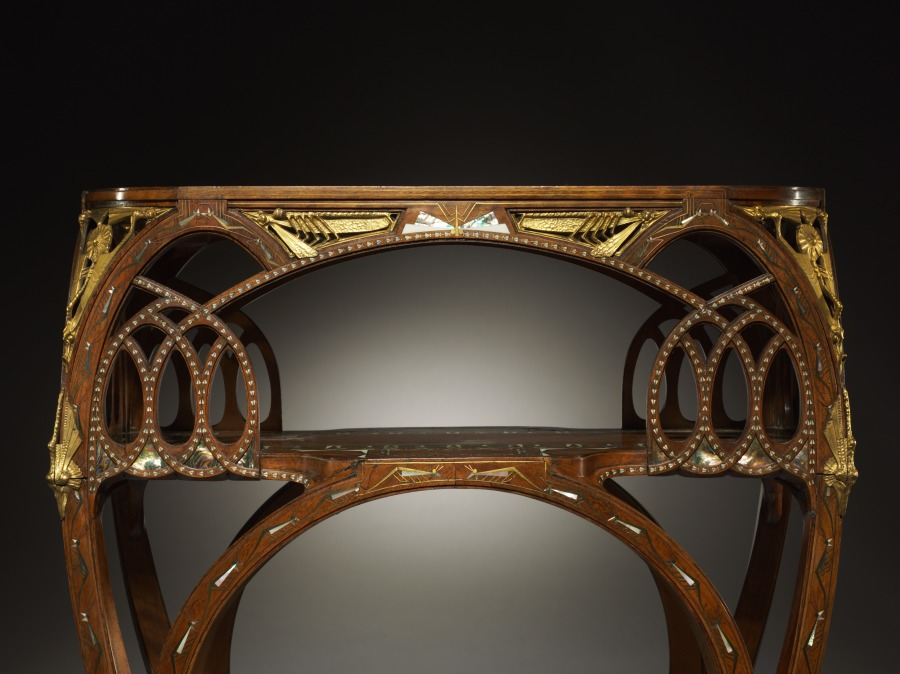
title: Tea Table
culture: France, Paris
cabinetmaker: Carlo Bugatti (Italian, 1856–1940)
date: c. 1907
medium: inlaid wood (mahogany?), cast and gilded bronze mounts, inlays of ivory or bone, metal, and mother-of-pearl (marine mussels or pearl oysters)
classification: Furniture and woodwork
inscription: signed in ligature in white metal inlay on central shelf: Bugatti.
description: Luxurious materials might catch the eye first, but a closer look reveals the imaginary creatures that adorn the surface of this table. Featuring elaborate arches, a favorite motif that appeared throughout Bugatti's furniture, this fantastical imagery is a window into the designer's expressive imagination.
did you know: Carlo Bugatti's sons achieved illustrious careers of their own. Rembrandt Bugatti (1884-1916) became a celebrated sculptor, and Ettore Bugatti (1881-1947) manufactured luxurious automobiles and racing cars.